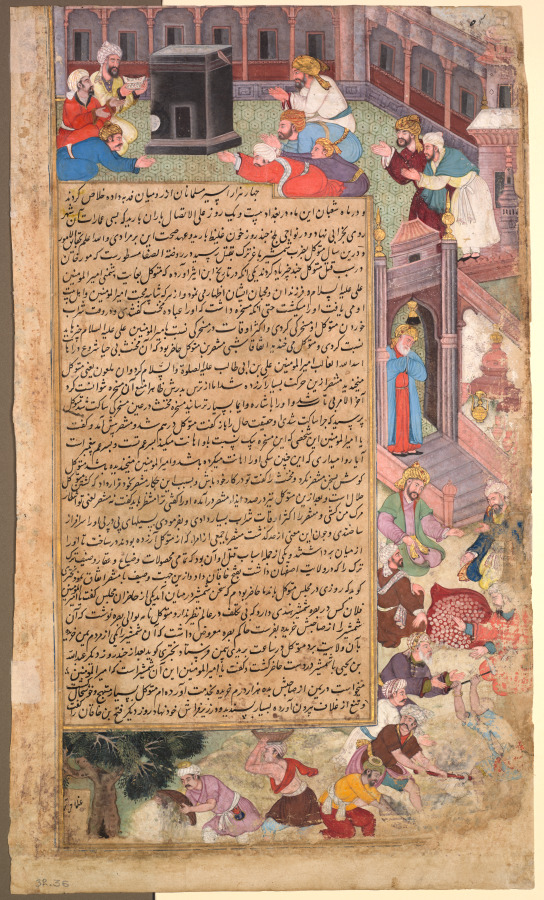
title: Page of disasters, from the Tarikh-i Alfi (History of the Thousand [Years])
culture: India, Mughal, 16th century, made for Akbar (reigned 1556–1605)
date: c. 1595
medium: Gum tempera, ink, and gold on paper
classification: Painting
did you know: Devastation after an earthquake includes a horse trapped under a fallen pavilion.